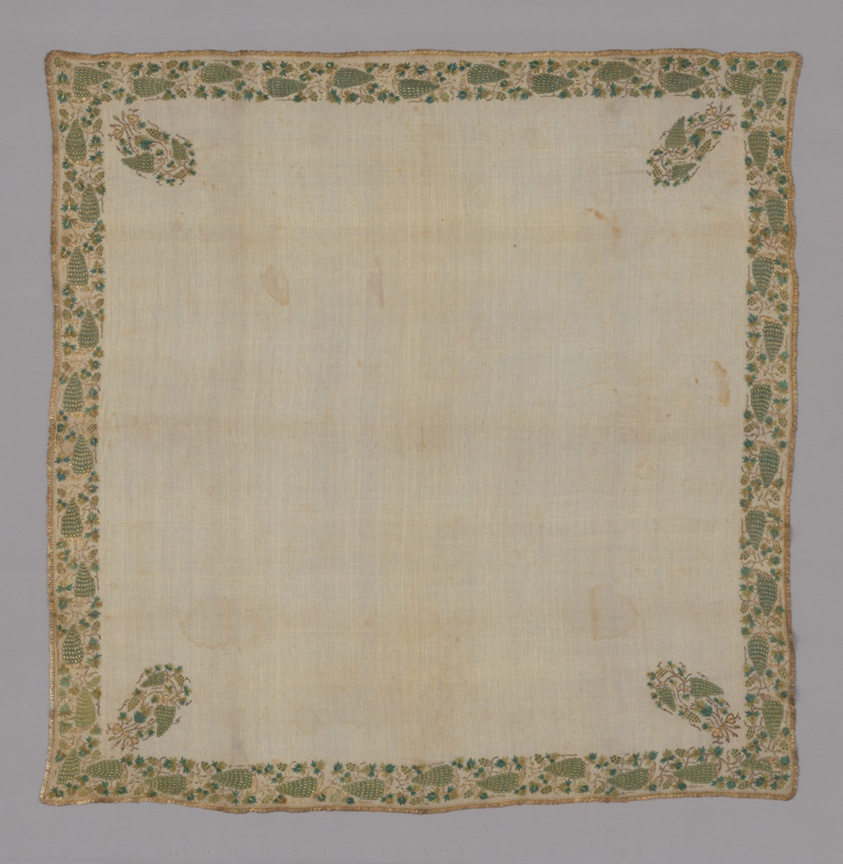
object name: Textile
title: Cover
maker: Turkey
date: 19th century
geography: Turkey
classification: textile; needlework (visual works); weaving